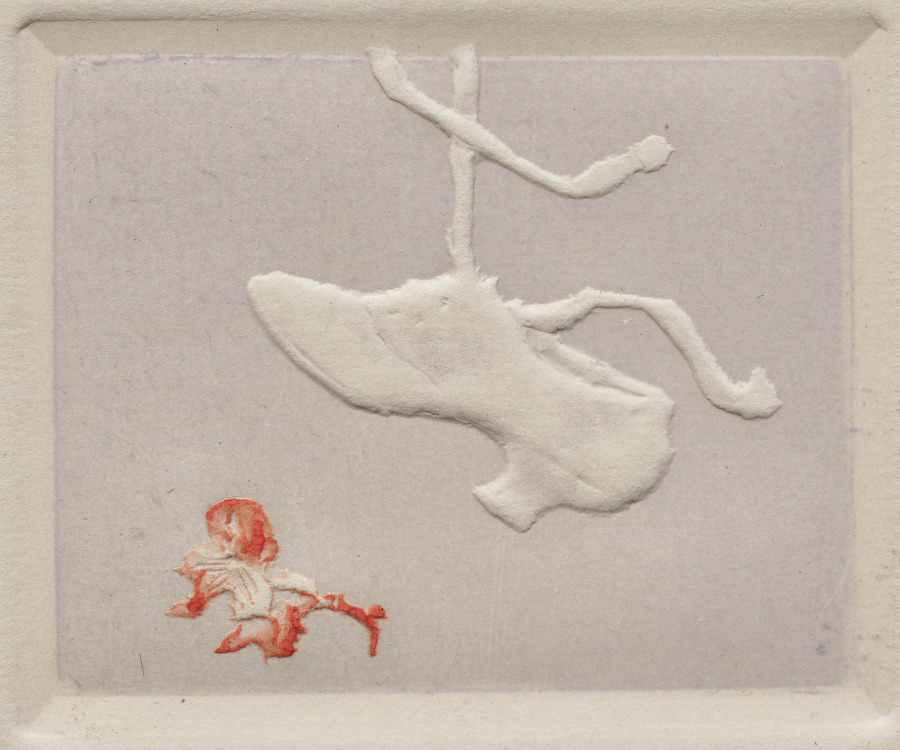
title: Shoe Suspended from a Ribbon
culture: France, early 20th Century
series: La Loïe Fuller, by Roger Marx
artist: Pierre Roche (French, 1855–1922)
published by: Les Cents Bibliophiles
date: 1904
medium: gypsograph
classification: Bound Volume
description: Although best known as a sculptor, Roche was a versatile and prolific artist who worked in many mediums. Loïe Fuller, the pioneer of modern dance who took Paris by storm in 1892, was one of his favorite subjects. He portrayed her in clay, bronze, marble, plaster, and in a series of gypsographs that illustrated an essay by the art critic Roger Marx. The book was described as "a precious monument to Loïe Fuller."